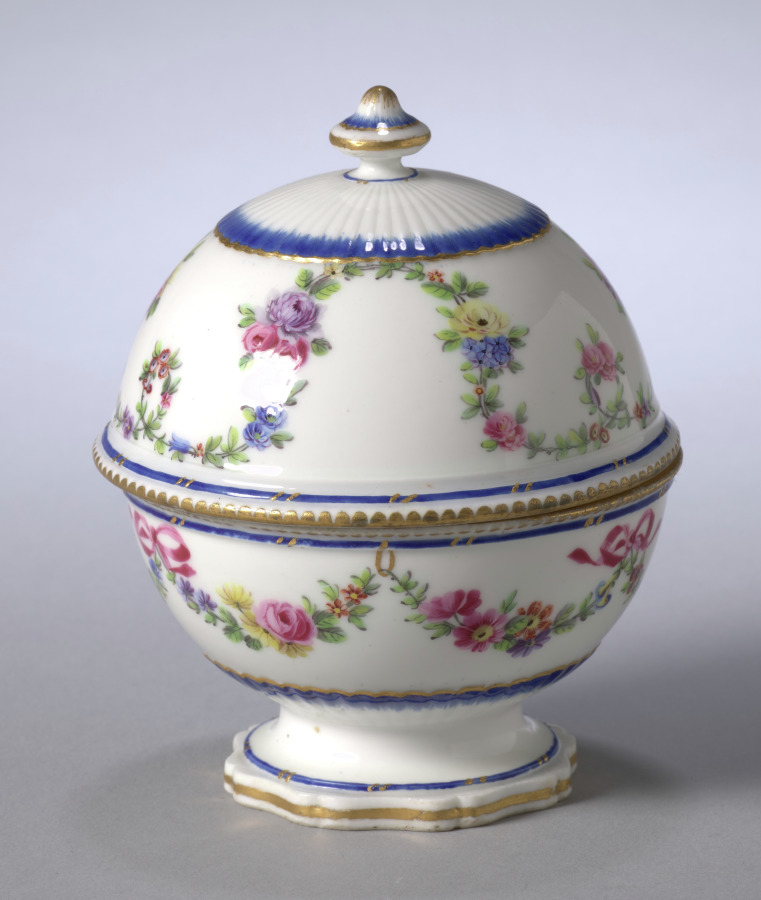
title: Soap Box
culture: France, Sèvres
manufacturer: Sèvres Porcelain Factory (French, est. 1756)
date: c. 1769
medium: soft-paste porcelain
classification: Ceramic